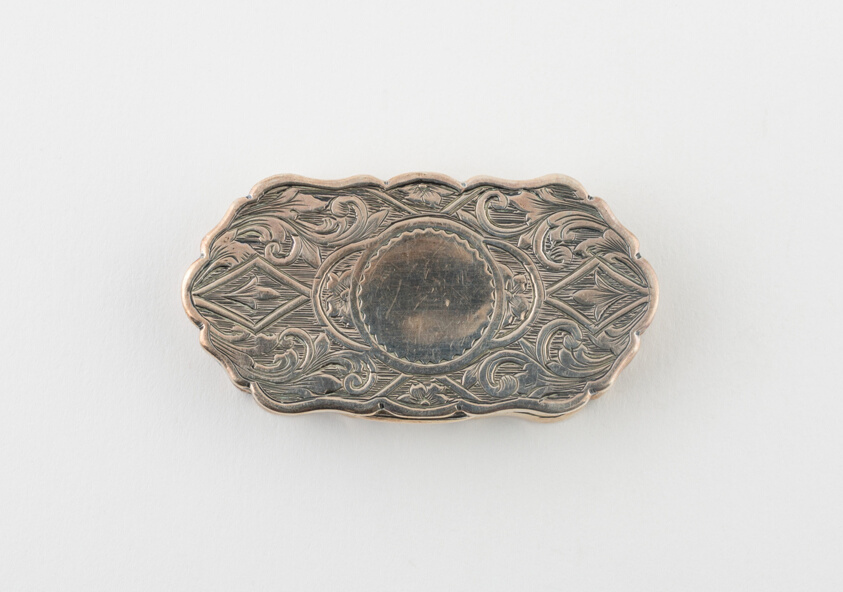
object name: Metalwork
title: Vinaigrette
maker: George Unite; Birmingham, England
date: c. 1848/49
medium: Silver and silver gilt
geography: Birmingham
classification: container for personal use; vinaigrette (container for health care); european decorative arts; metalwork; silver; decorative object/ornament